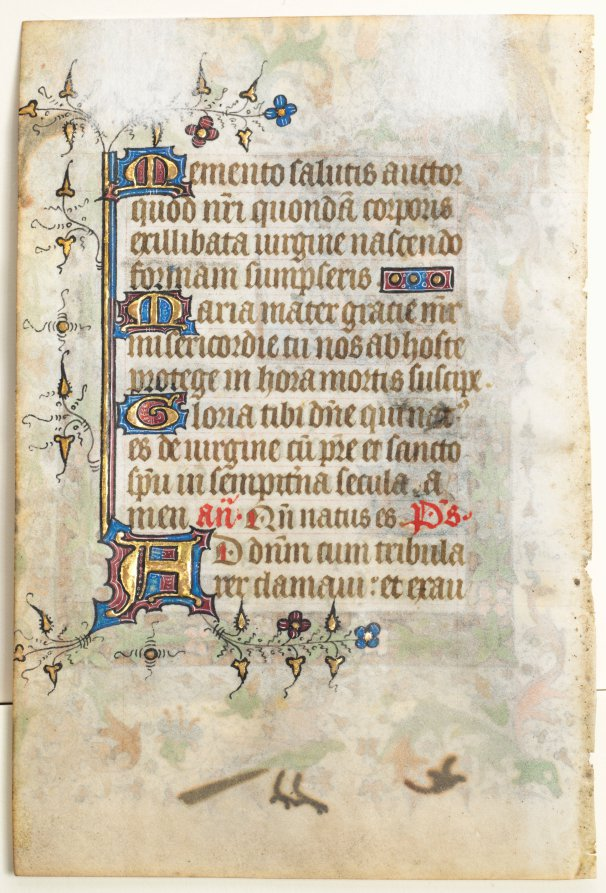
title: Leaf from a Book of Hours: Decorated Initial D[eus] with Foliated Border (Opening of Terce: Hours of the Holy Spirit)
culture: Flanders, Ghent?, 15th century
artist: Master of Guillebert de Mets (Flemish)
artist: and Workshop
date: 1430s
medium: ink, tempera and gold on vellum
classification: Manuscript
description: The Master of Guillebert de Mets (probably Jean de Pestivien) is named after the scribe who recorded his name in an illuminated copy of the Decameron (a collection of stories by Giovanni Boccaccio, written 1351–53) made for Duke Philip the Good of Burgundy, and for which the artist contributed several miniatures. The Master of Guillebert de Mets was active from about 1410 to 1445. So far there is no proof that allows us to follow his career or to know precisely where he worked. Some evidence, however, hints that he was of Flemish origin. The artist painted in an easily recognizable style. His figures have prominent heads with clearly delineated eyes and small mouths, slender torsos with thin, spindly legs, and long, finely worked fingers. Many of his miniatures, such as the Crucifixion and Last Judgment here, show that he often favored mosaic backgrounds of delicately worked checkered patterns.